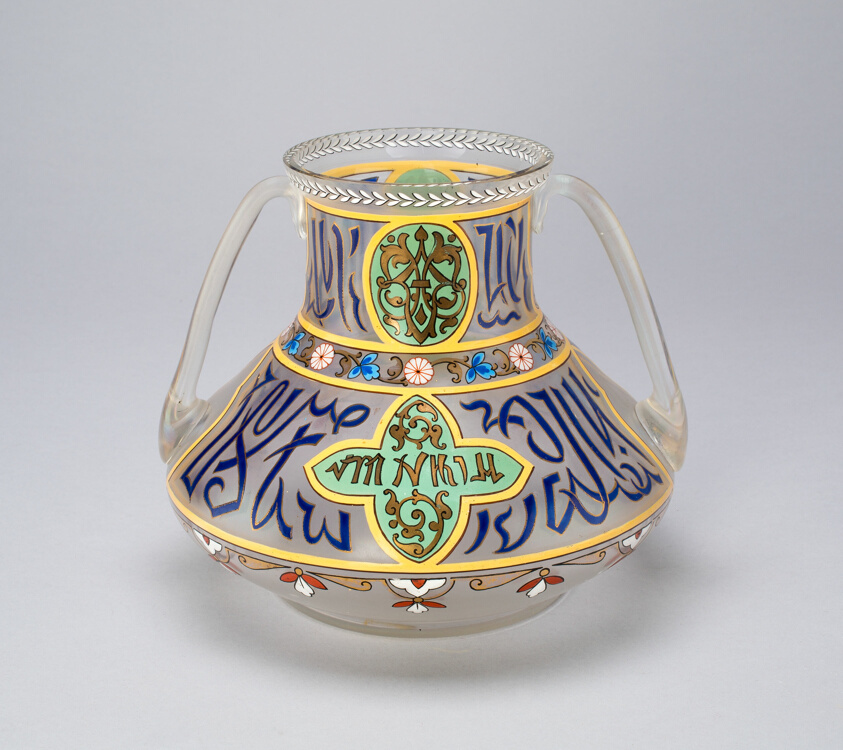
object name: Glass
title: Vase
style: Art Deco, Art Nouveau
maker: Fritz Heckert Glass Refinery and Glassworks; Petersdorf, Silesia (now Poland), 1866-1923; Possibly designed by Otto Thamm; German, 1860-c. 1905; Possibly decorated by Adolph Heyden; German, 1838-1902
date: c. 1900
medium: Glass with enamel decoration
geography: Silesia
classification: vase; vessel; glass